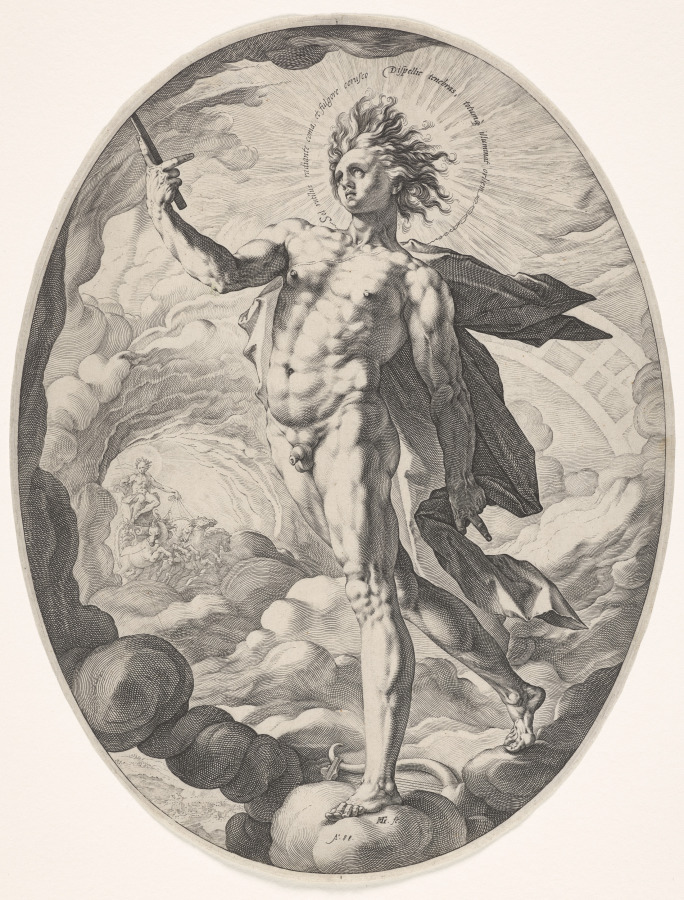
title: Apollo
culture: Netherlands, 16th century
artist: Hendrick Goltzius (Dutch, 1558–1617)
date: 1588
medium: engraving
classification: Print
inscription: upper center, in plate (words form a halo around Apollo's head): Sol rutilus radiante coma, et fulgore corusco / Dispellit tenebras, totumque illuminat orbem ; lower center, in plate: HG.[in monogram] fe. ; lower center, in plate: A°.88. ; VERSO, upper center, in graphite: 38 N°60 ; upper center, in graphite: H. Goltzius ; lower center, in graphite: C3575 7. ; lower center, in graphite: 1-10 ; lower right, in graphite: H 131 ; lower right, in graphite: 12[circled] ; lower left, in graphite: 1C [lt?]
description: This engraving depicts Apollo as the radiant sun god. With fire-like hair, he strides through rolling waves of clouds, while in the background his chariot makes its daily trip across the sky. The Latin text that forms his halo translates: “With its aureole and shining ray, the bright Sun drives away the darkness and lights the whole earth.” Apollo’s excessively muscled body reflects an aspect of Mannerism, a stylistic trend in the mid- to late 1500s that exaggerated natural qualities. By over embellishing Apollo’s musculature, Goltzius transformed an athletic male body into a supernatural one.